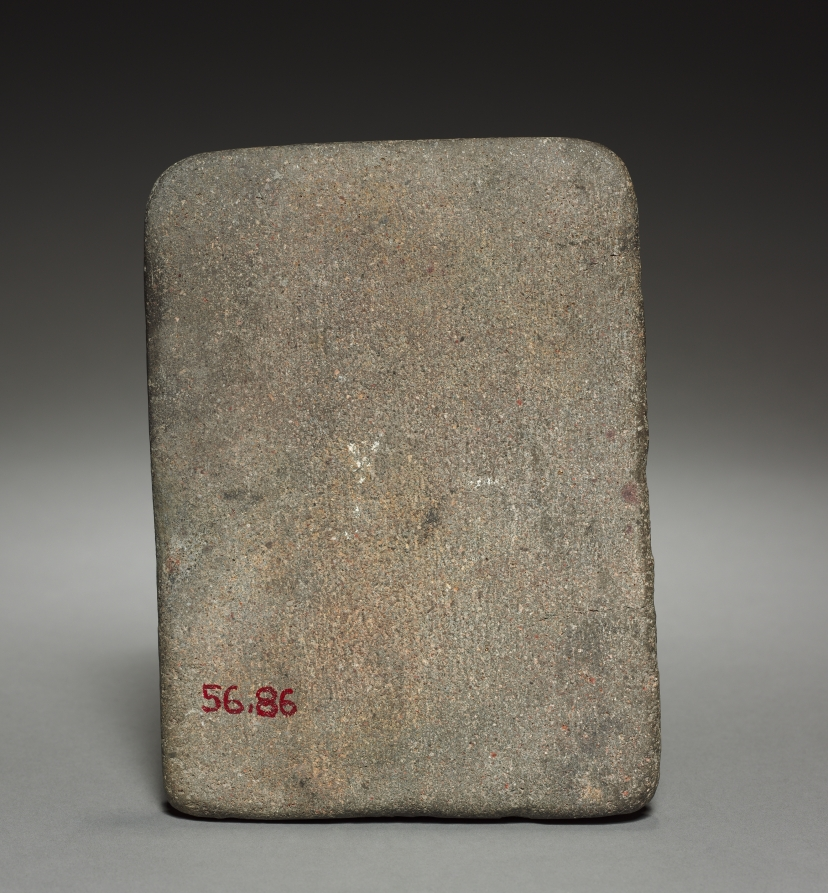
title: Miniature Metate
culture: Central Mexico, Xochicalco?, Classic Period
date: 700–1000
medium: stone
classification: Stone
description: This miniature grinding stone, decorated on the underside, was made during an era of extensive interregional contacts and artistic influences. The bar and four dots below the serpent represent the number nine, executed in the style of Xochicalco, in Morelos. The rattlesnake above resembles contemporary carvings from Veracruz, to the east. Possibly "9 Rattlesnake" was the name of an individual, or a date in the poorly understood Xochicalco calendar.